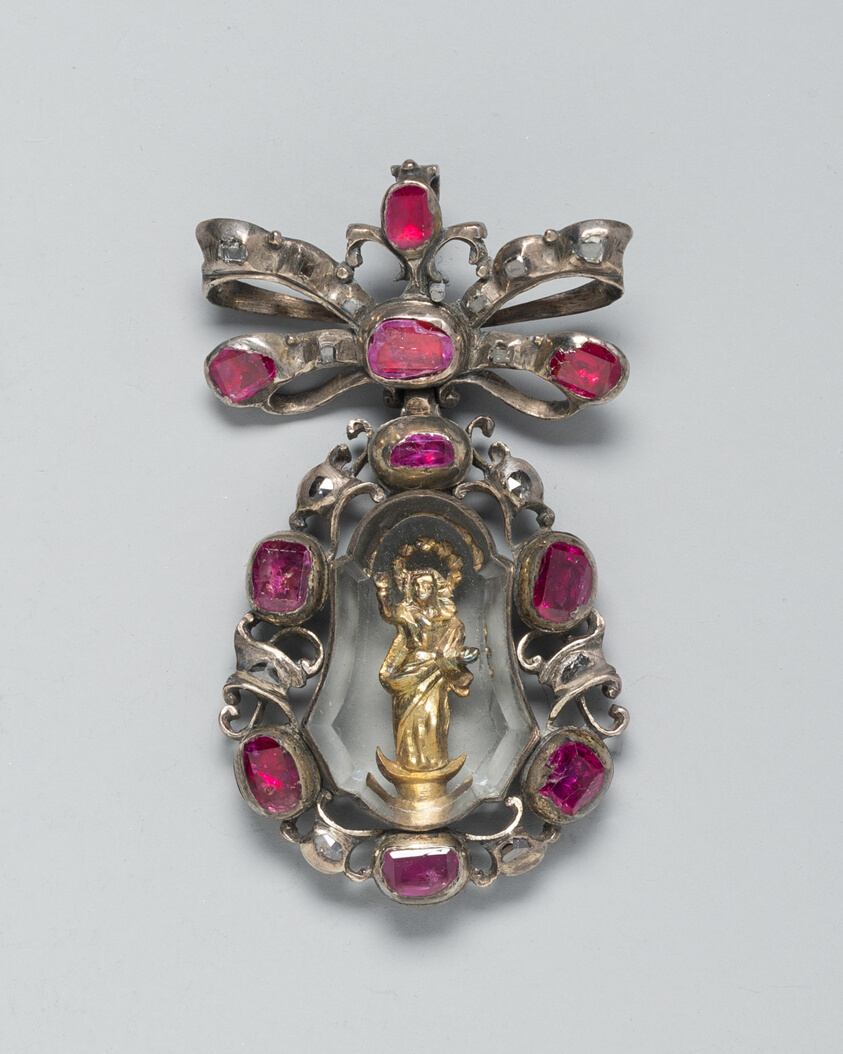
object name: Costume and Accessories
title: Pendant with the Virgin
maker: Spanish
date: c. 1650-c. 1700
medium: Silver, silver gilt, rubies, diamonds, and glass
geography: Spain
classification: pendant (jewelry); jewelry; european decorative arts; costume